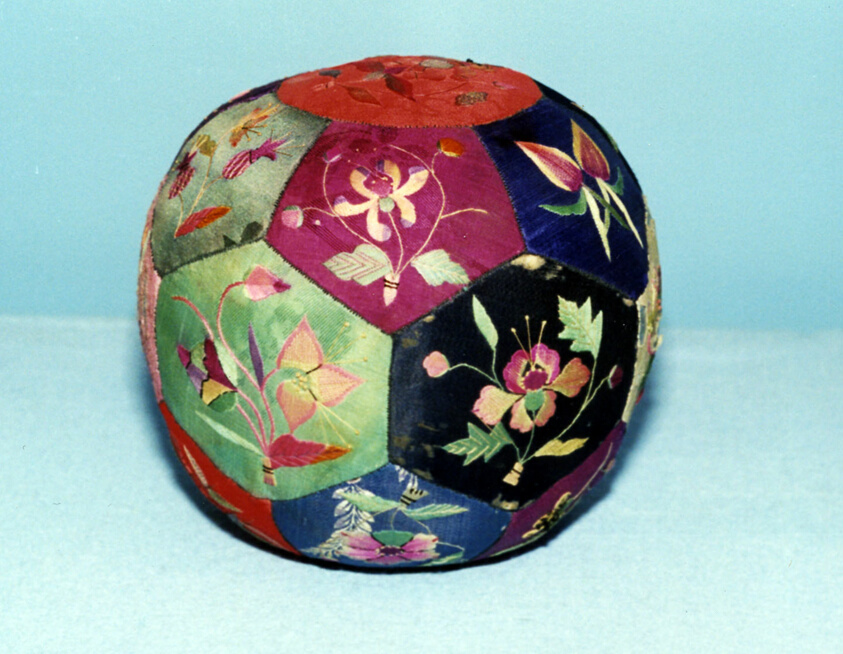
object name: Textile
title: Ball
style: chosen, Korean (culture or style), East Asian, asian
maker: Korea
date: Choson dynasty (1392–1910), 19th century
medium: Silk, shaped in twelve pentagonal, six hexagonal, and two circular motifs of satin, satin damask, twill, and plain weaves; some self-patterned; all embroidered with silk in knot, ribbed back stitched wheel, single, darned and padded satin, running, and whipped running stitches; pile formed from cut running stitches; padded with paper; laid work and couching; pieced with cotton in overcast stitches; underlaid with cotton, plain weave; padded; and filled with rattling element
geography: Korea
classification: textile; needlework (visual works)